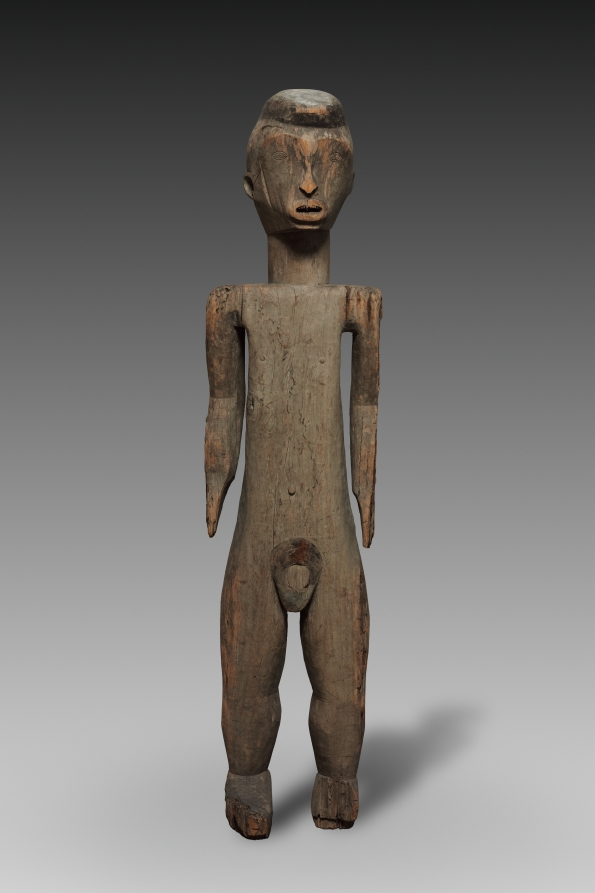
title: Figure of a Pair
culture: Africa, Central Africa, Democratic Republic of the Congo or Central African Republic (most likely), possibly Monzombo-style maker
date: late 1800s–early 1900s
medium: Wood and iron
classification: Sculpture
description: The Ubangi region's history of successive migrations and assimilations has resulted in numerous exchanges of religious beliefs and ritual practices. Despite some stylistic traits, including the heart-shaped faces and the male's crested coiffure, this figure with its female pair is unlike any other in the Ubangian corpus. Based on indirect evidence, the pair is said to represent the culture's primordial couple.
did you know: This pair is of a male and female and is said to represent the culture's primordial couple. There are no other carved mother-child figures that originate from the Monzombo ethnic group.